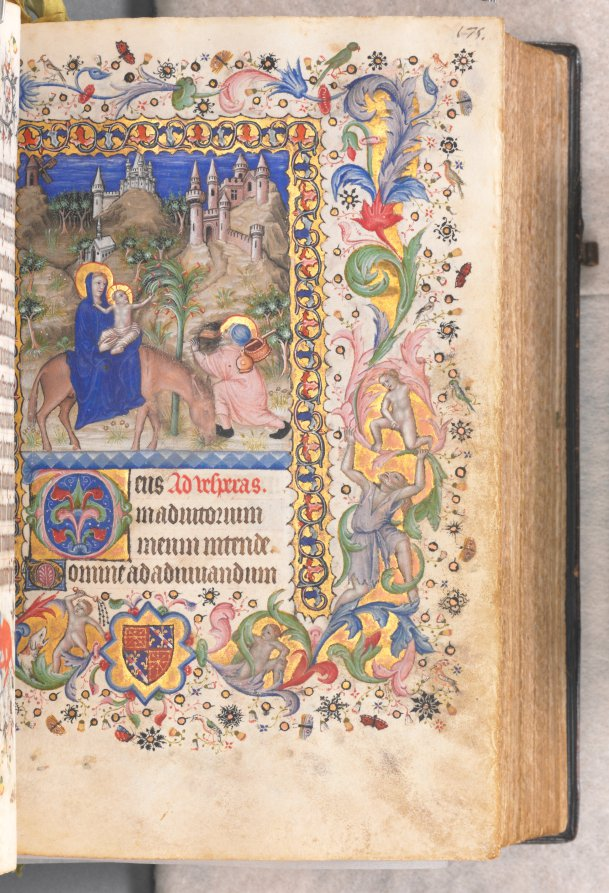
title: Hours of Charles the Noble, King of Navarre (1361-1425): fol. 88r, Flight into Egypt (Vespers)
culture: France, Paris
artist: Master of the Brussels Initials and Associates (French)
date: c. 1405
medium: ink, tempera, and gold on vellum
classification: Bound Volume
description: This precious volume was obviously highly prized by its owner, the French-born King of Navarre, who had his coat of arms painted on no less than twenty folios. Rather than directly commissioning this manuscript from a specific workshop, it seems that Charles the Noble acquired his book of hours -- perhaps ready-made for the luxury market -- while on a trip to Paris in 1404-05. A collaborative effort, six painting styles are evidenced within the pages of this codex, those of two Italians, two Frenchmen, and two Netherlanders. The painter who was responsible for the planning and decoration of the book, and who produced seventeen of the large miniatures, was a Bolognese artist known as the Master of the Brussels Initials. His principal assistant, responsible for most of the borders, was a Florentine who signed his name "Zecho" da Firenze on folio 208 verso.